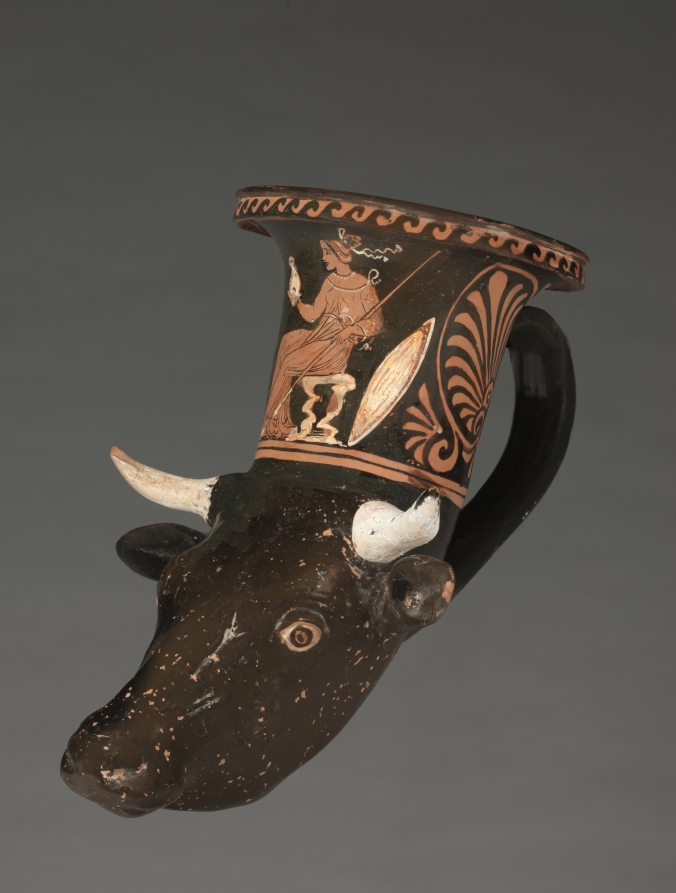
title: Red-Figure Cow-Head Rhyton (Drinking Horn): Seated Woman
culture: South Italian, Apulian, Tarentine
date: c. 340 BCE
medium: ceramic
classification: Ceramic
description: Rhyta (drinking horns) in the forms of animal heads were popular ceramic products in Apulia c. 350-320 BC. Mold-made heads were attached to wheel-made bowls, with separately made handles (plus ears and horns, for this cow). On the bowl, a seated woman holds a helmet and spear, with a shield nearby; she may represent Athena, although the helmet differs from her usual type and she does not appear to wear her snaky aegis (breastplate).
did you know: The cow-head rhyton was the most popular of all Apulian animal-head rhyta.